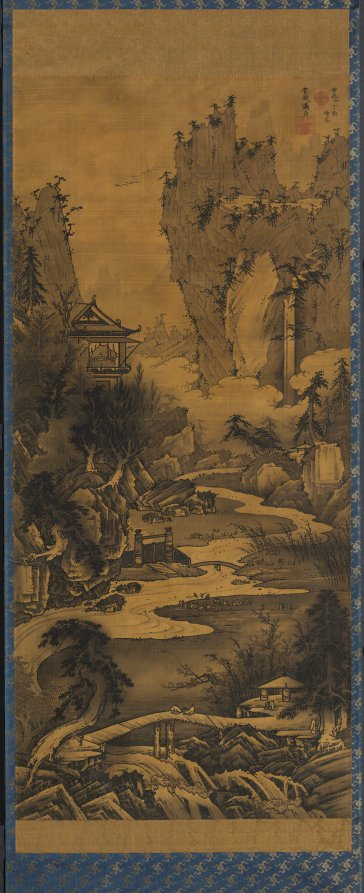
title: Orchid Pavilion Gathering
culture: Japan, Edo period (1615–1868)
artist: Soga Shōhaku (Japanese, 1730–1781)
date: 1777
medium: hanging scroll; ink on silk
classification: Painting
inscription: Inscribed upper right: Sixth year of An'ei (1777) mid-winter, Soga Shohaku Seal: Dasokken Shohaku Seal: Unread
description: This painting depicts a famous gathering that took place in China in AD 353 to celebrate the Spring Purification Festival, also known as the Double Third Festival, as it takes place on the third day of the third lunar month. The host invited everyone to the Orchid Pavilion to compose poetry and drink wine. Guests floated wine cups down a nearby creek, and where they landed, people had to drink the wine and compose a poem.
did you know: The Buddhist temple Bairinji in Kurume City, Fukuoka prefecture, Japan, and the National Gallery of Victoria in Melbourne, Australia, own compositions by the same artist on the same theme.